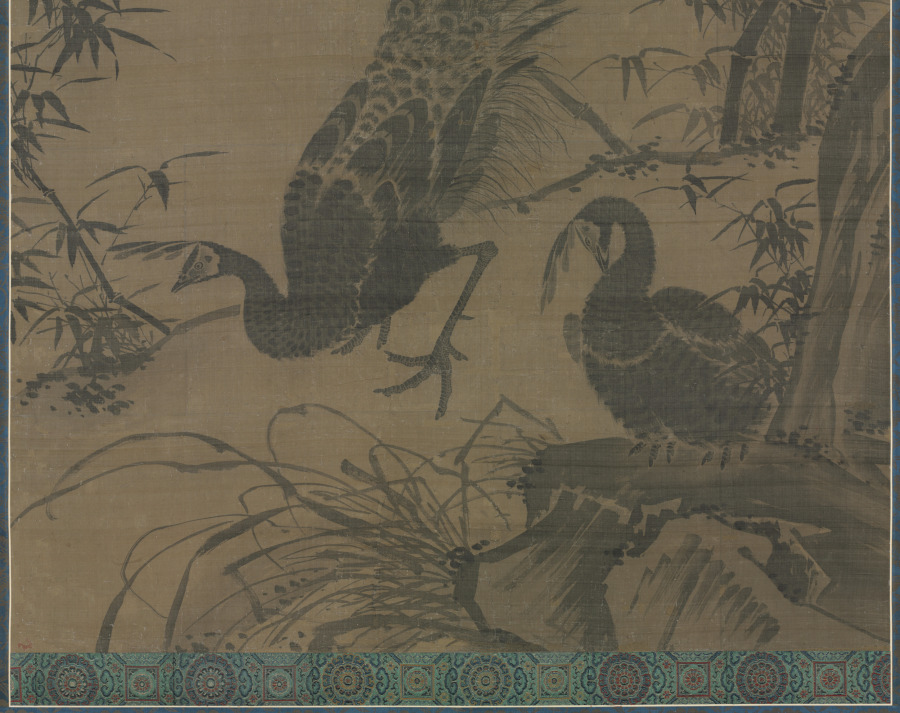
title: A Pair of Peafowl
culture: China, Ming dynasty (1368–1644)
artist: Lin Liang (Chinese, 1416–1480)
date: late 1400s-early 1500s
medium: hanging scroll, ink on silk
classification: Painting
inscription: 林良. [印] 以善圖書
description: The peacock, identified by the flamboyant tail, is paired with a female peahen to its right. In lowering her head, the hen seems to show respect to the male peacock. With his articulate brushstrokes and strong contrasting tones, Lin Liang’s representation in black ink appears as vivid as Yin Hong’s colorful peacock (1974.31). The painter skillfully uses wet and dry ink as well as broad and thin washes to represent the plumage of the bird. The surface of the rocks, depicted in powerful sweeping strokes, recalls the landscape painting style of the Zhe School, which specialized in expressive brushwork.